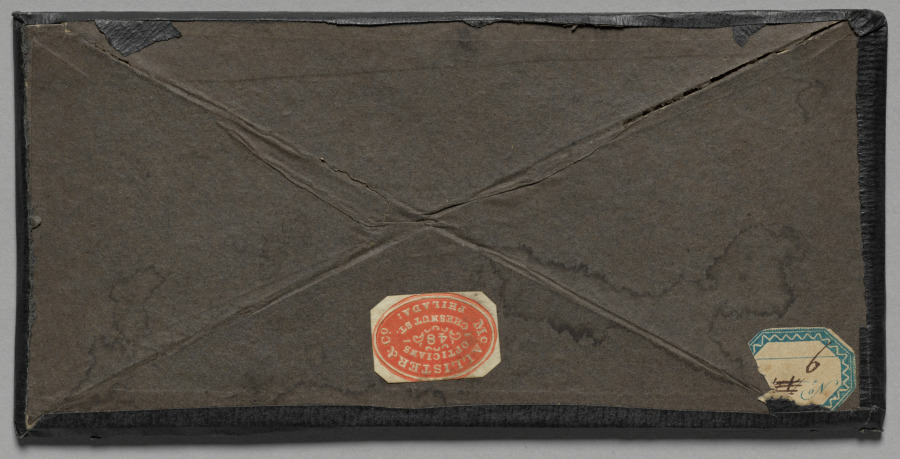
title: Monkey on Branch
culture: America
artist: attributed to Louis Jules Duboscq-Soleil (French, 1817–1886)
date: c. 1855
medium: stereo daguerreotype, sixth plate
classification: Photograph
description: A stereoscopic viewer was invented by David Brewster in 1849, but he could not get British manufacturers interested, so took it to Paris in 1850. There, he showed it to Louis Jules Duboscq-Soleil, who not only manufactured it but also began making his own stereoscopic daguerreotypes including this one. Along with natural history specimens, Duboscq-Soleil also photographed painted portraits and sculptures.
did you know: Among the avid fans of the stereoscopic daguerreotypes of Louis Jules Duboscq-Soleil was Queen Victoria of Great Britain.